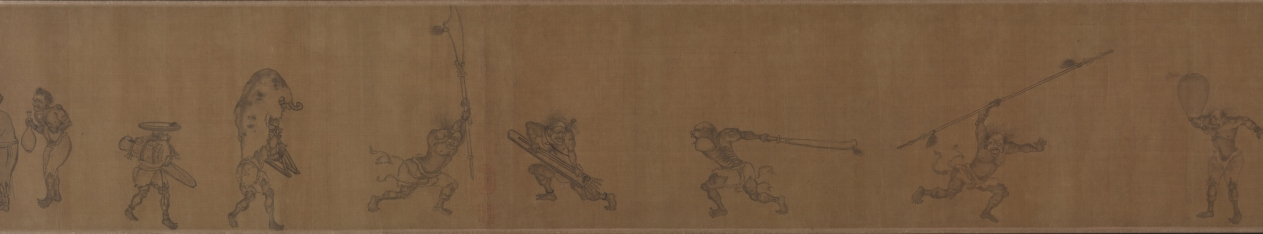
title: The Lantern Night Excursion of Zhong Kui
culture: China, Yuan dynasty (1271-1368)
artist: Yan Hui (Chinese, active 1270–1310)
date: late 1200s–early 1300s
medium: handscroll; ink and slight color on silk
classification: Painting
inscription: Artist's signature [and probable seal]: Yan Qiuyue 顏秋月 Title on frontispiece and 1 seal of Niu Shuyu 鈕樹玉 (1760–1827): Qiuyue mohuan 秋月墨幻 [Qiuyue's Ink Fantasy]. 31 additional seals: 2 of Yang Shiqi 楊士奇 (1365–1444); 2 of An Guo 安國 (1481–1534); 8 of Xiang Yuanbian 項元汴 (1525–1590); 2 of Geng Zhaozhong 耿昭忠 (1640–1686); 4 of Pu Tung 溥侗 (1870–1952); 7 of Tan Jing 譚敬 (1911–1991); 1 of Liu Ting-chih (20th c.); 5 unidentified.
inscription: An inscription by Zizhi Shanren 紫芝山人 [probably Jiang Hui 蔣惠], dated 1389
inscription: An inscription by Wu Kuan 吳寬 (1436–1504)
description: Here, the demon queller Zhong Kui leads a nightly procession of street entertainers with bare, muscular bodies and demonic faces. Some wear shabby clothes, and all perform stunts and tricks to astound and scare the viewer. In fact, a New Year custom in cities of southeast China had the poor, disguised as demons, process through the streets and play their tricks to clear households of evil spirits and welcome the spring. From right to left, a demonic figure leads the procession and beats a drum; another lifts a large rock; one stands on his hands trying to drink; one balances a jar on his elbow; three hold and wield weapons; one carries a folded chair covered by a cow’s skin; another holds Zhong Kui’s qin (zither), books, brush, and inkstone. At the end of the scroll, two figures offer a cup and bottle of wine to Zhong Kui, who lifts his hand in command.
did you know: Zhong Kui was an ancient ghostbuster.